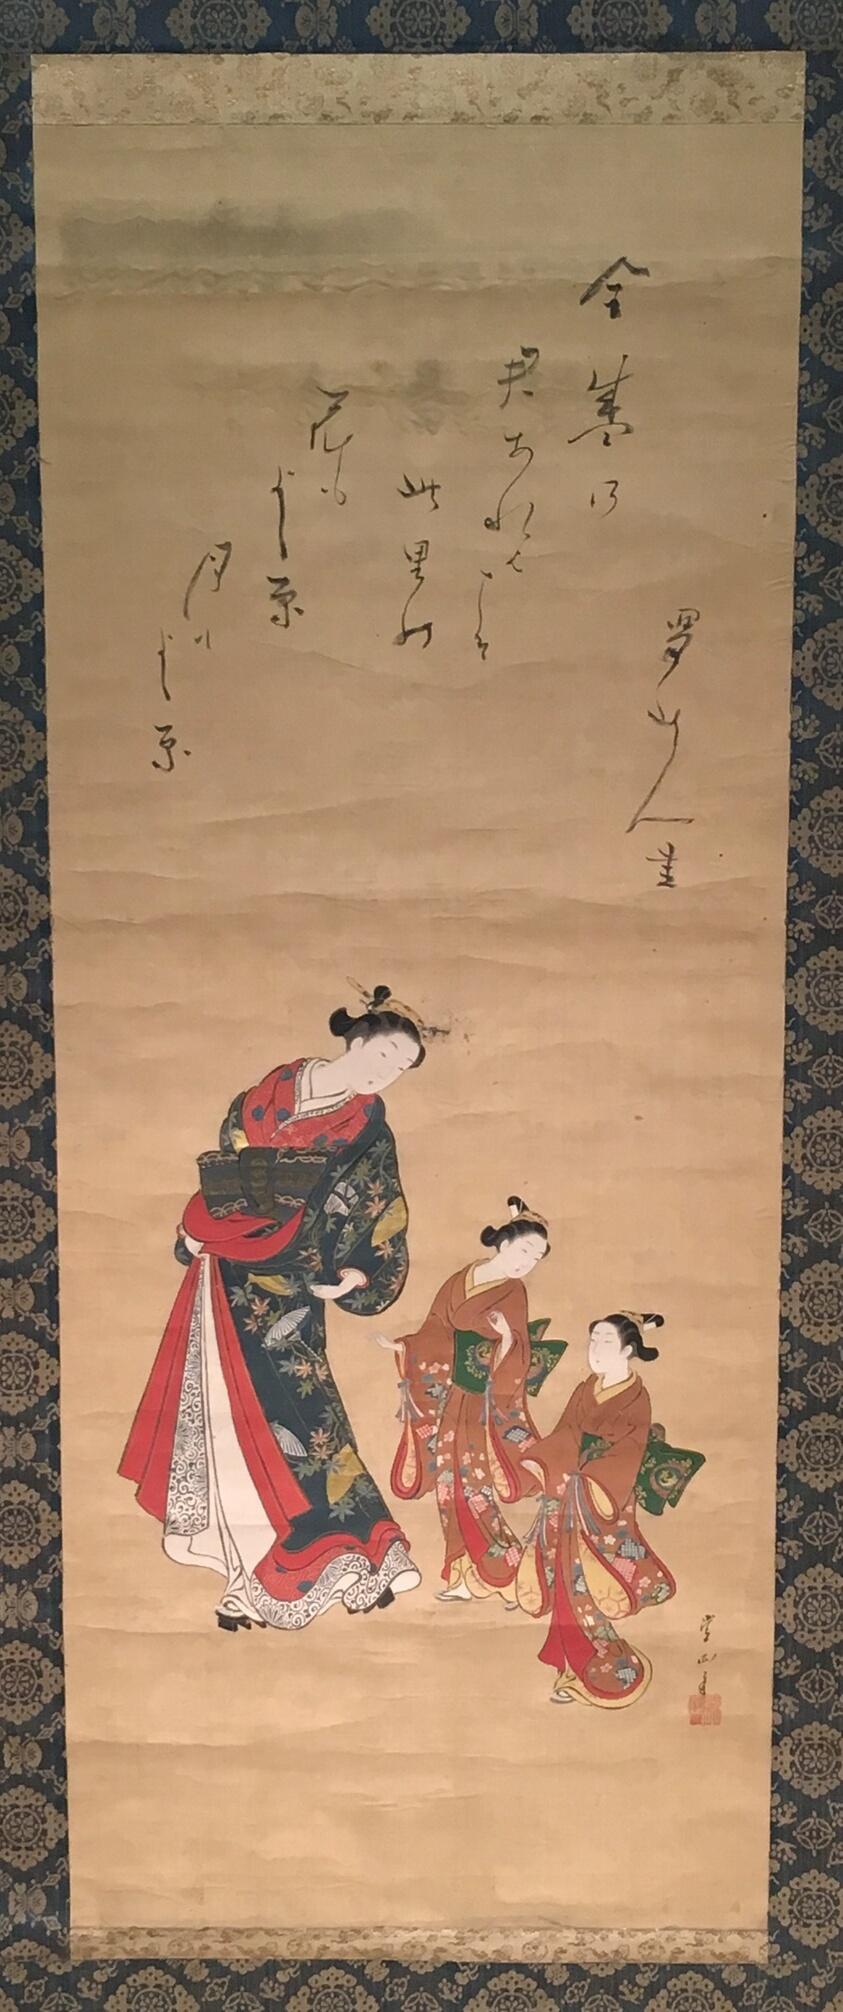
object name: Painting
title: Courtesan and two attendants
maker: Kawamata Tsunemasa,; Japanese, active about 1716-1751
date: about 1723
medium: Hanging scroll; ink and color on paper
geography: Japan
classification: hanging scroll; painting; asian art